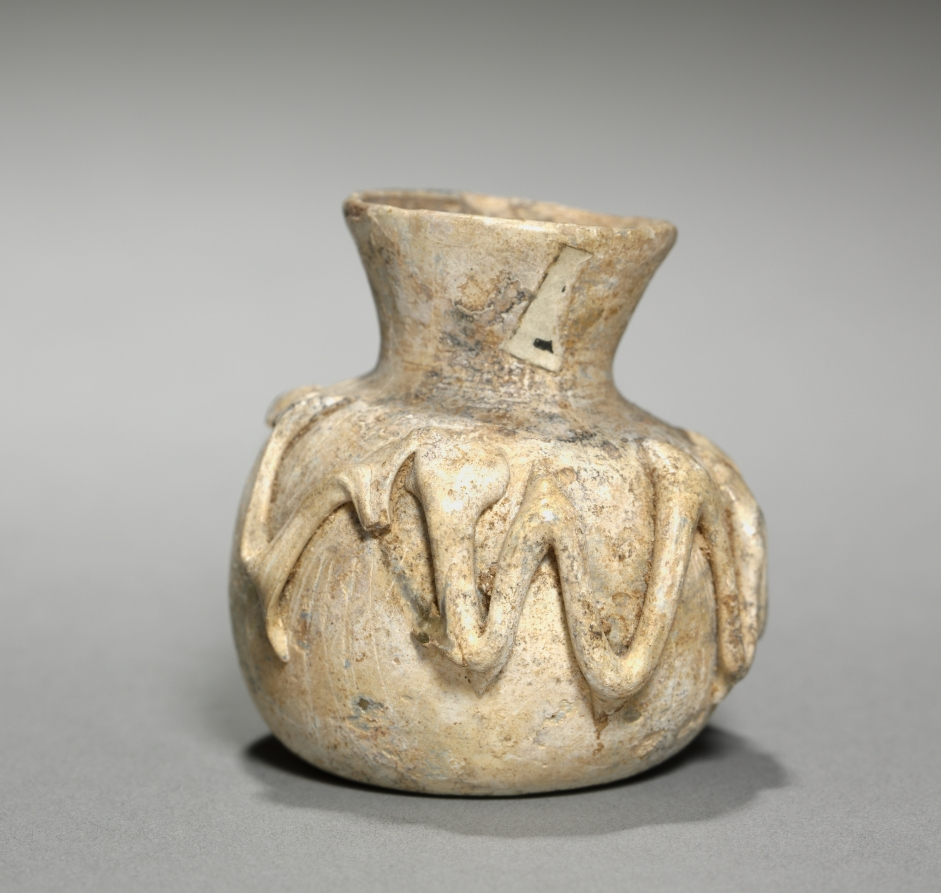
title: Vase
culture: Eastern Mediterranean, Roman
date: 200–500 CE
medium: glass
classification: Glass